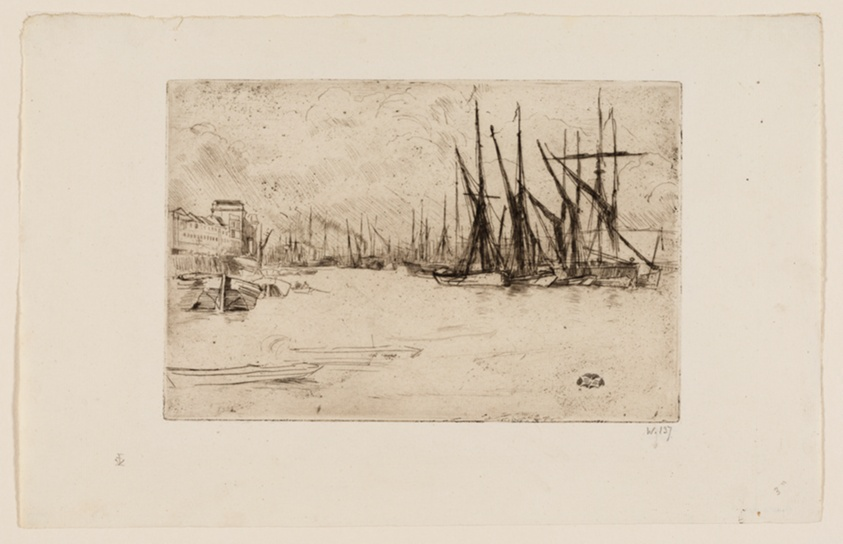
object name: Print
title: Pickle Herring Wharf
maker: James McNeill Whistler (American, 1834-1903)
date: 1876/77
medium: Etching and drypoint with foul biting in black ink on off-white laid paper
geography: United States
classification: etching; drypoint; foul biting; print; prints and drawing; paper